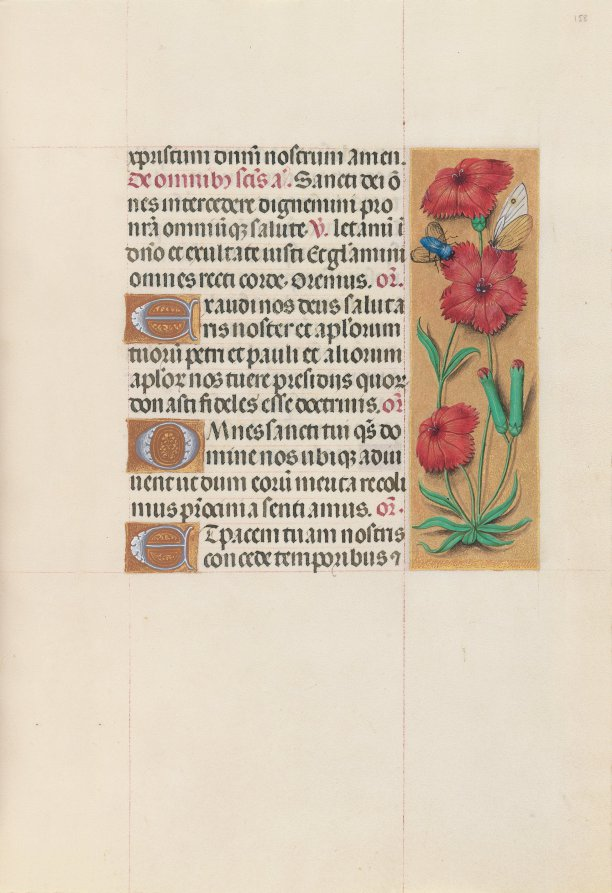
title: Hours of Queen Isabella the Catholic, Queen of Spain: Fol. 158r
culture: Flanders, Ghent and Bruges, late 15th century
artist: Master of the First Prayerbook of Maximillian (Flemish, c. 1444–1519)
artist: and Associates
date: c. 1500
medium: ink, tempera, and gold on vellum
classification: Bound Volume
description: This manuscript was illuminated by a circle of at least five highly organized manuscript painters active in the Flemish cities of Ghent and Bruges. The principal illuminator was Alexander Bening, who painted the majority of the book's miniatures. Manuscripts produced by this circle of artists are renowned for the decoration of their borders, which typically feature a rich variety of realistically-painted flowers, birds, and butterflies. This prayer book, called a book of hours, was intended not for a cleric, but for the private devotions of a lay person-in this case, Isabella the Catholic, Queen of Spain (1451-1504). Isabella's coat of arms embellishes the book's frontispiece. It is unlikely that the book was commissioned by the Queen herself; rather, she probably received it as a diplomatic gift from someone courting her patronage, perhaps Cardinal Francisco Jimenez de Cisneros. A Franciscan friar, Jimenez was dependent upon Isabella for his advancement, first to the post of Queen's confessor in 1492, and then to Archbishop of Toledo in 1495.